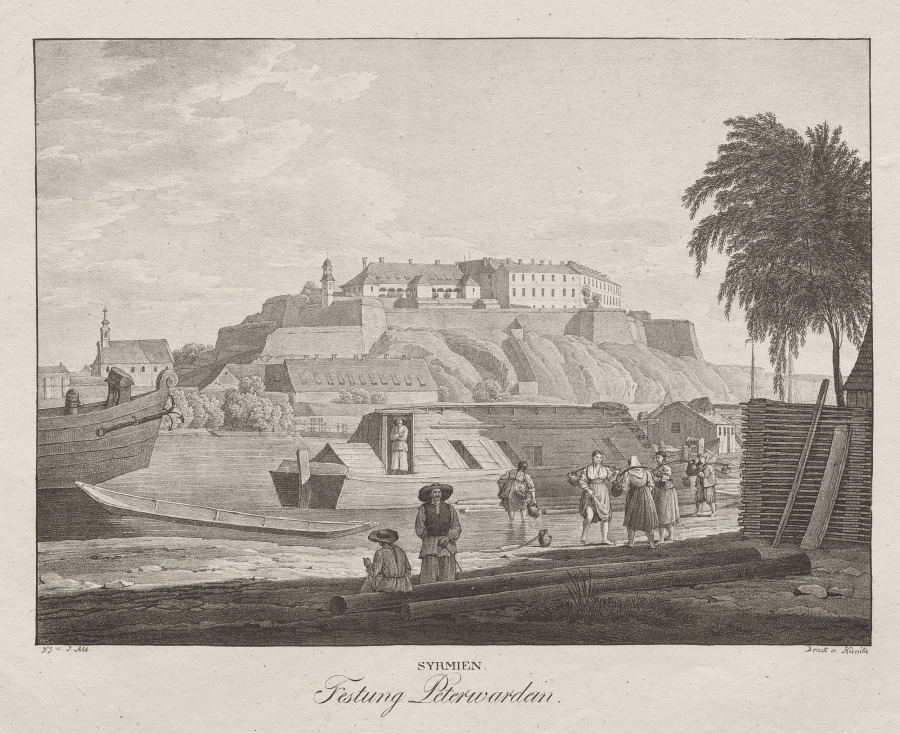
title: Syrmien, Festung Peterwardein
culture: Austria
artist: Jakob Alt (Austrian, 1789–1872)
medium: lithograph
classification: Print